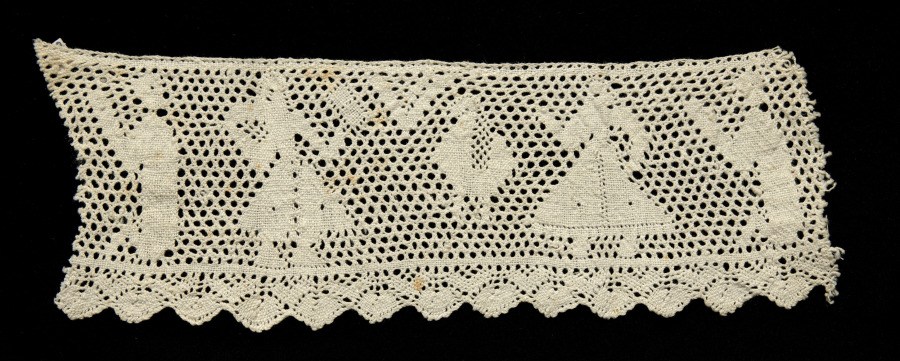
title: Lace Insertion and Edging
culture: Italy, Abruzzi, Pescocostanzo(?)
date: 1600s–1700s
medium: Bobbin lace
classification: Lace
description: This piece of lace, depicting a rooster between figures of a man and a woman flanked by angels, tells the story of St. Peter and the rooster that crowed three times.